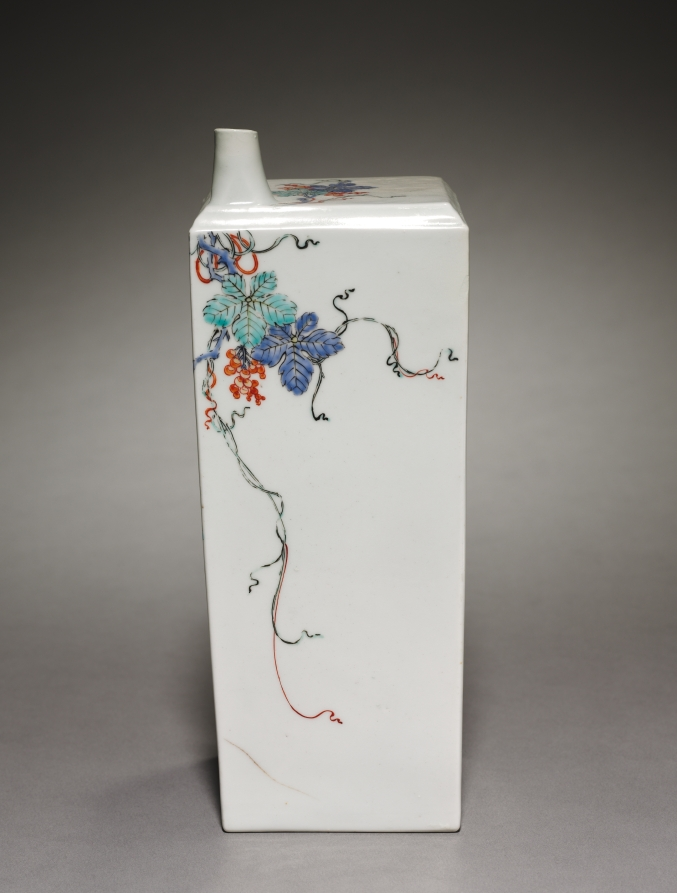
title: Square Bottle with Squirrel and Grapes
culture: Japan, Edo period (1615–1868)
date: late 1600s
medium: porcelain with overglaze color enamel (possibly Hizen ware, Kakiemon type)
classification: Ceramic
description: In the 1600s, Korean and Japanese elites could enjoy wine from Europe. In his 1636 travel diary called Haecharok, Kim Seryeom, a vice director of Korean envoys to Japan, recorded that the head of Japan’s Tsusima Island treated him to Western red wine. Therefore, export porcelain ware like Square Bottle with Squirrel and Grapes could have been made as a wine bottle.